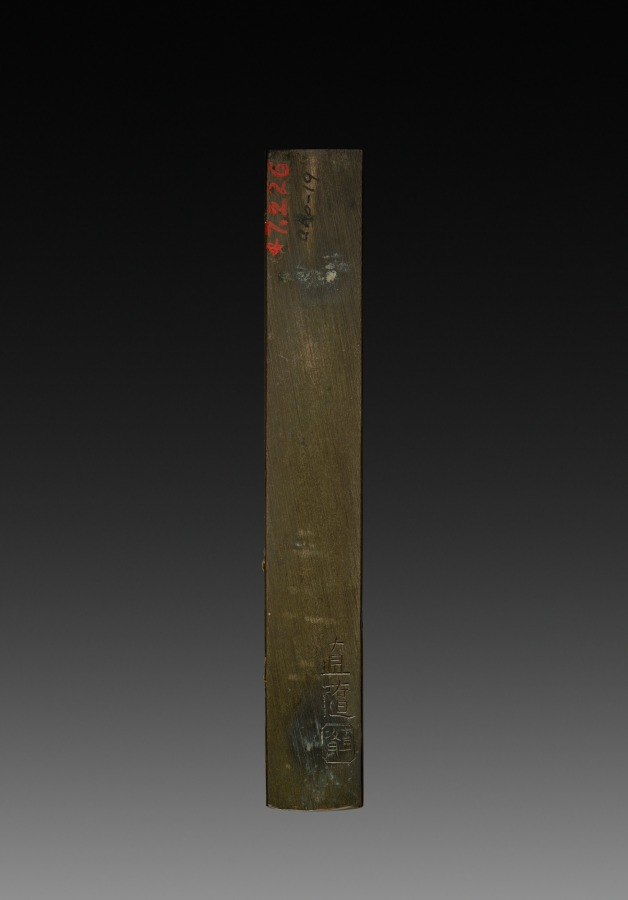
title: Knife Handle (Kozuka)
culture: Japan, Edo period (1615–1868)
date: c 1800s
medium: inlaid bronze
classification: Metalwork